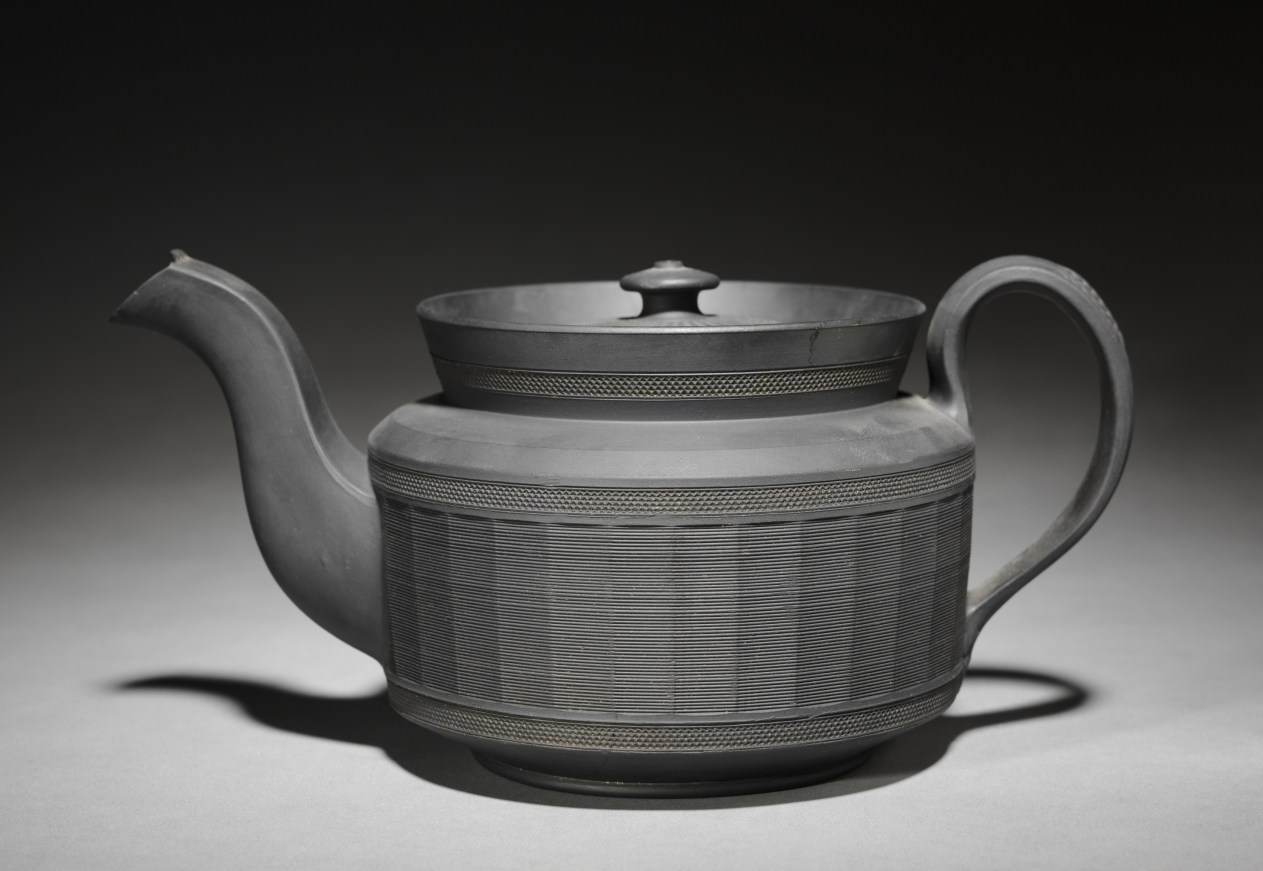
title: Teapot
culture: England, Staffordshire, 19th century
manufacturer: Davenport Pottery and Porcelain Factory (British)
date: 1800s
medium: black basalt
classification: Ceramic